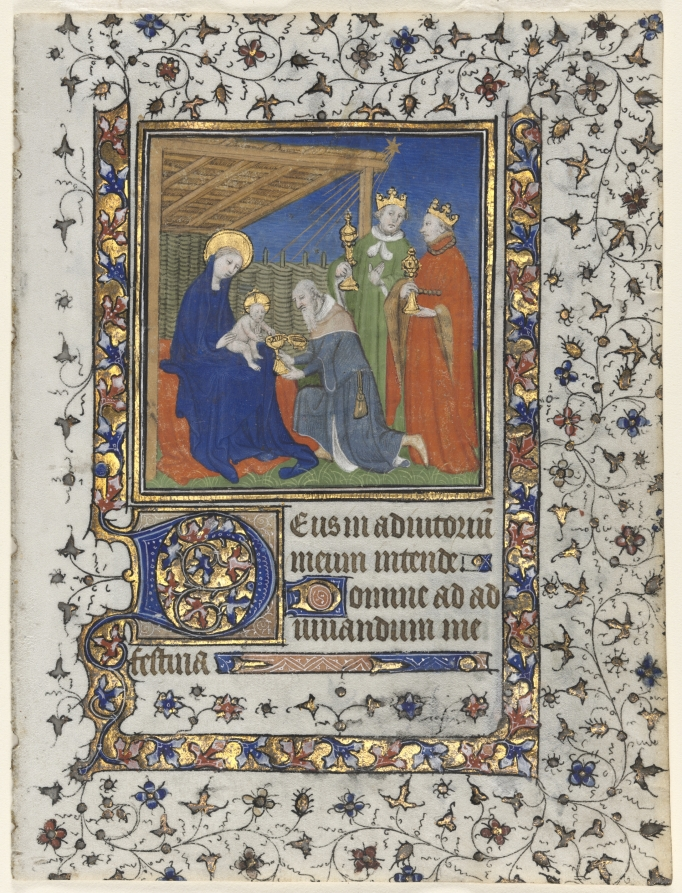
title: Bifolio from a Book of Hours: Adoration of the Magi (recto); Text (verso)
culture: France, Paris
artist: workshop of Boucicaut Master (French, Paris, active about 1410–25)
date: c. 1415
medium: ink, tempera, and gold on vellum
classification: Manuscript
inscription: Deus in adiutorium meum intende. Domine, ad adiuvandum me festina.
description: Books of hours were devotional books popular in the Middle Ages. Meant for laypeople, or those not in the clergy, they were used at home and contained daily prayers as well as prayers for specific occasions, such as death, plague, warfare, travel, or bad weather. The heart of every book of hours is the Hours of the Virgin. With this set of prayers, the reader asked the Virgin Mary to intercede on their behalf. The Adoration of the Magi opens sext, the sixth hour of the day, or noon. The Coronation of the Virgin begins compline, which is before retiring for the evening.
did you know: All books of hours contain the same basic sections and were highly customizable.